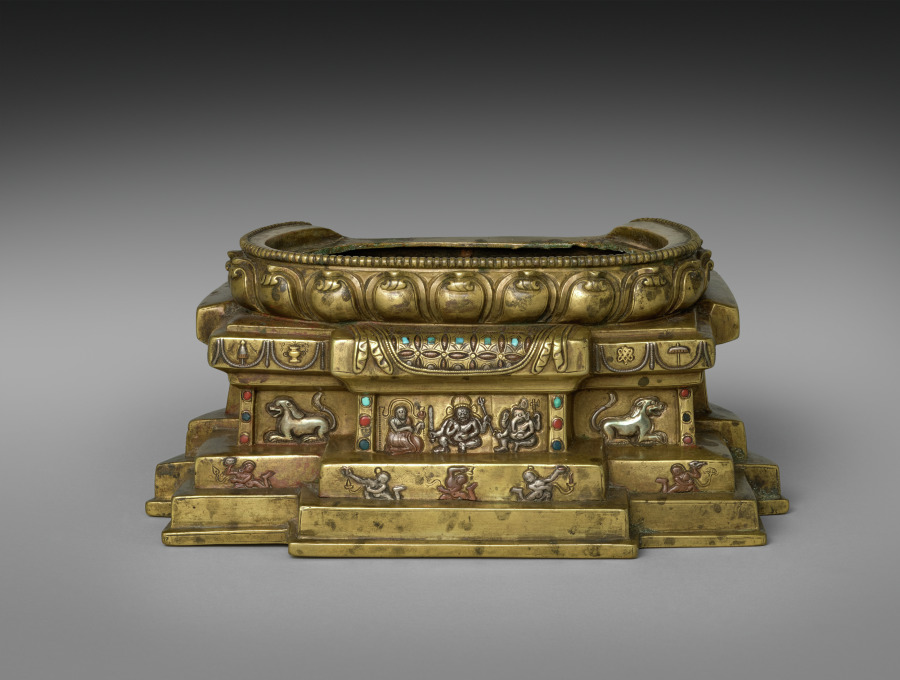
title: Base for Portrait of Phagmo Drupa Dorje Gyalpo (1110–1170)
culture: Central Tibet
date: 1200s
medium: gilt bronze, inlaid with gold, silver, copper, turquoise, lapis and coral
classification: Sculpture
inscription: / / Na mo 'ghu ru / / Ngan lam ban chung bdag gis ni / / bla ma Rin chen sku bzhengs pa yi / / bsod nams 'di yi byin brlabs kyis / / 'gro drug sdug sngal zad par shog / / Translation: "Salutations to the master ! May the sufferings of the six kinds of beings be appeased through the blessing of merit gained by me, the little monk of Ngan.lam, in having this statue of the Lama Rin.chen made."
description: This portrait statue depicts the first monastic leader of the prominent Buddhist monastery of Densatil, an influential early leader of the Tibetan Buddhist monastic order called Kagyu, famous for his views on the importance of meditation. He sits on a lotus pedestal and lion throne, like a Buddha, and his hand positions (mudras) communicate that meditation leads to enlightenment.